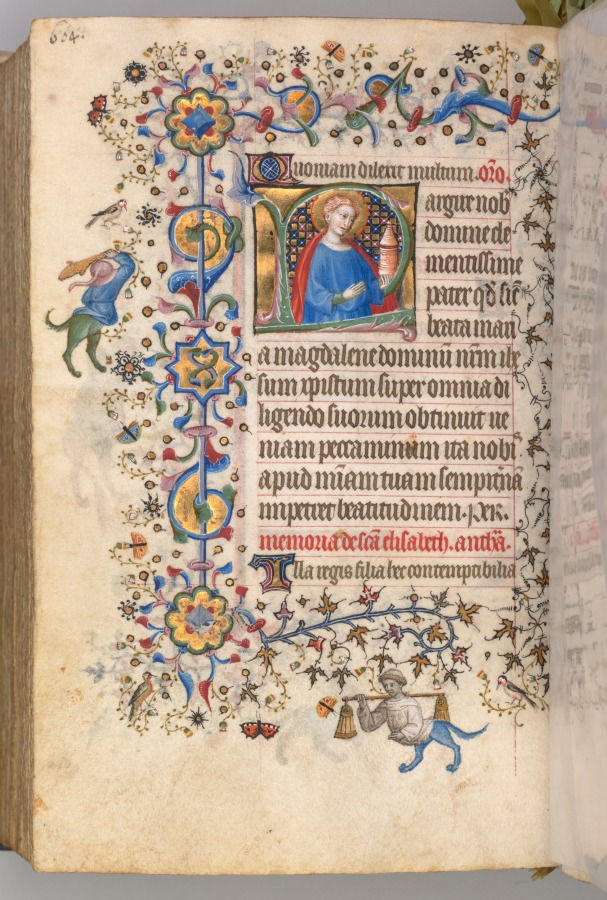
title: Hours of Charles the Noble, King of Navarre (1361-1425): fol. 296v, St. Mary Magdalene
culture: France, Paris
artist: Master of the Brussels Initials and Associates (French)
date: c. 1405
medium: ink, tempera, and gold on vellum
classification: Bound Volume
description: This precious volume was obviously highly prized by its owner, the French-born King of Navarre, who had his coat of arms painted on no less than twenty folios. Rather than directly commissioning this manuscript from a specific workshop, it seems that Charles the Noble acquired his book of hours -- perhaps ready-made for the luxury market -- while on a trip to Paris in 1404-05. A collaborative effort, six painting styles are evidenced within the pages of this codex, those of two Italians, two Frenchmen, and two Netherlanders. The painter who was responsible for the planning and decoration of the book, and who produced seventeen of the large miniatures, was a Bolognese artist known as the Master of the Brussels Initials. His principal assistant, responsible for most of the borders, was a Florentine who signed his name "Zecho" da Firenze on folio 208 verso.